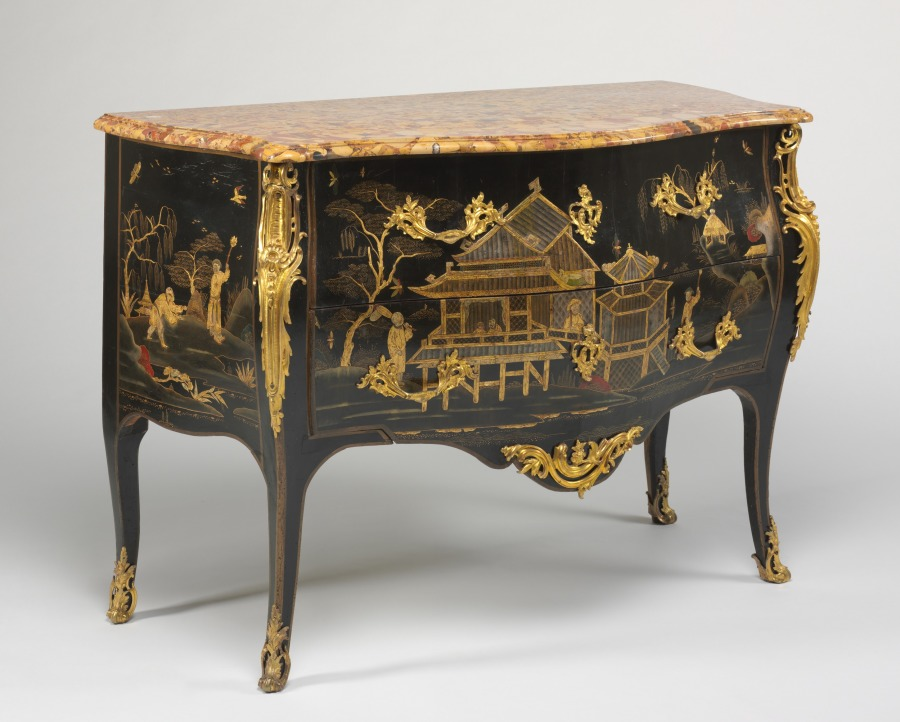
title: Chest of Drawers (Commode)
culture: France, 18th century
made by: probably by Adrien Faizelot Delorme (French)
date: c. 1750– 1765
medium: oak, black lacquer with raised chinoiserie decoration, gilt metal mounts, marble top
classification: Furniture and woodwork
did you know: Although this chest of drawers was made in France, its decoration is an imitation of Chinese lacquer, which reflects European perceptions of East Asia at the time.